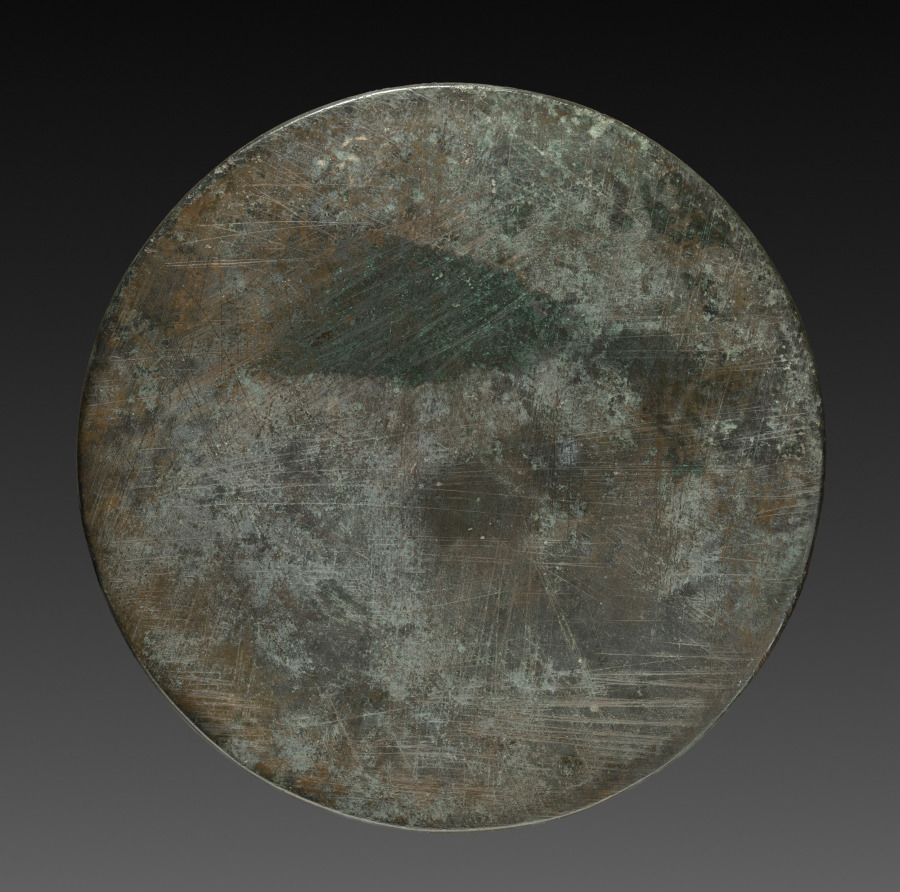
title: Mirror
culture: Japan, Heian period (794–1185)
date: 794–1185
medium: bronze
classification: Metalwork